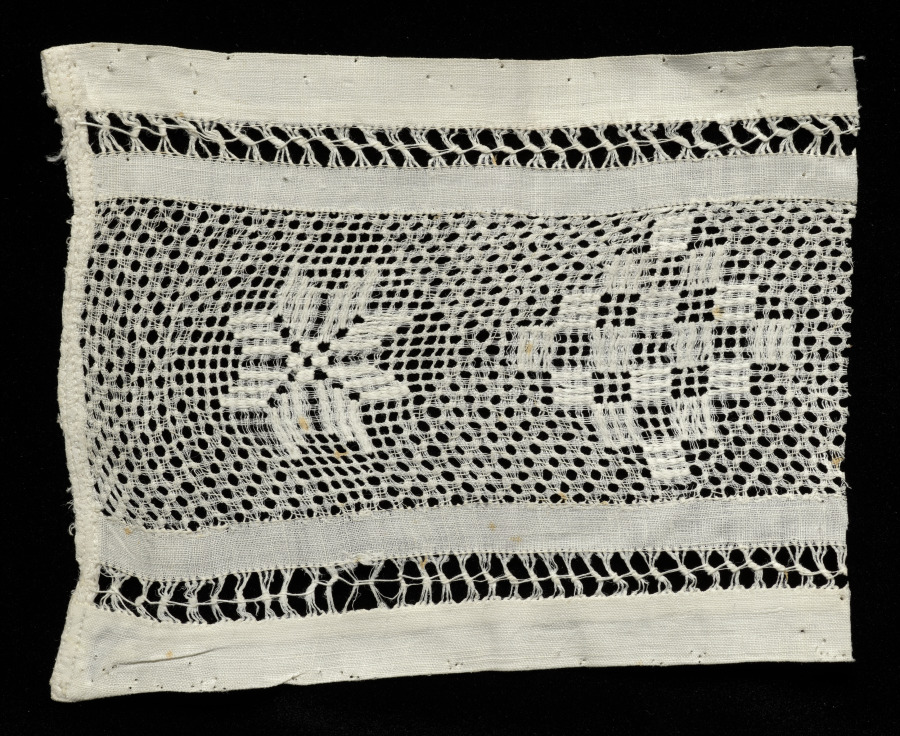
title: Fragment of a border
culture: Spain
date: 1800s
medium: Linen: needle lace (drawnwork)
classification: Lace